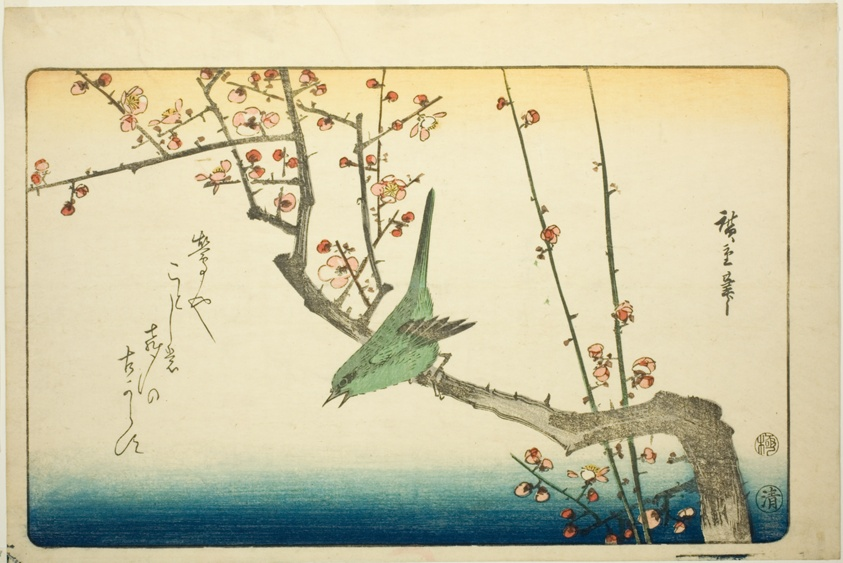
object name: Print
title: Bush warbler on plum branch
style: Japanese (culture or style)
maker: Utagawa Hiroshige 歌川 広重; Japanese, 1797-1858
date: 1840s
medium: Color woodblock print; aiban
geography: Japan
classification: woodblock print; print; asian art